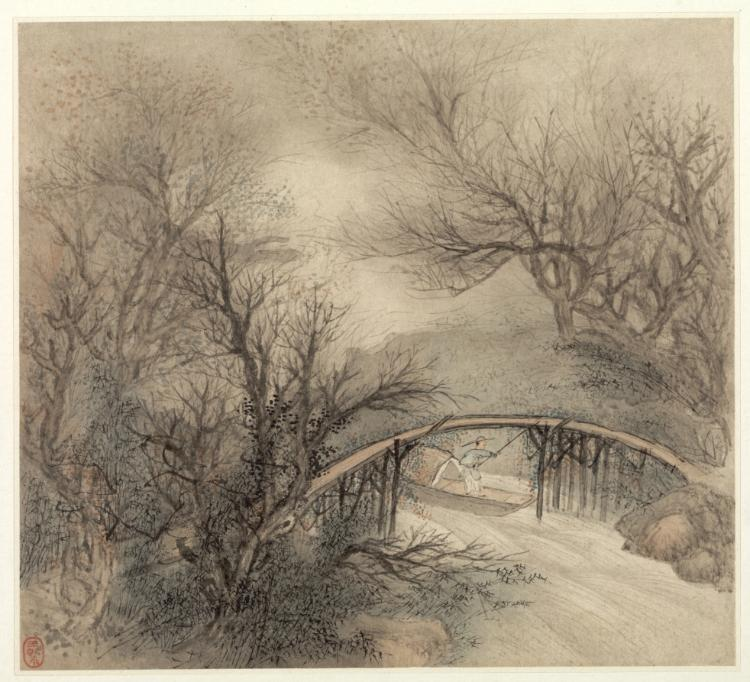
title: Album of Landscapes: Leaf 1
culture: China, Qing dynasty (1644-1911)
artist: Wang Gai (Chinese, active c. 1677–1705)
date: 1677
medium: album leaf, ink and light color on paper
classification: Painting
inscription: Poem by Shih-Jun-chang